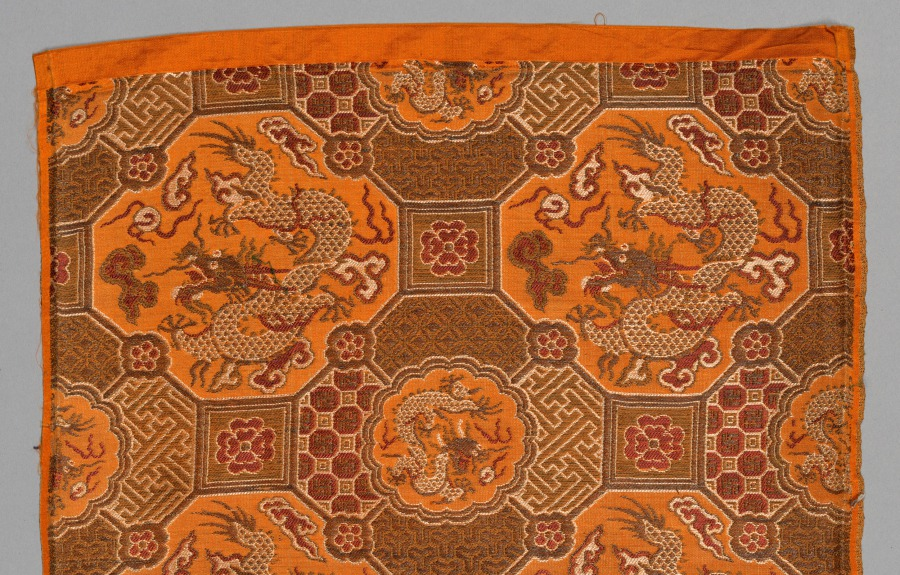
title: Table Runner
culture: Japan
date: late 19th-early 20th century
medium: silk and metallic thread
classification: Textile